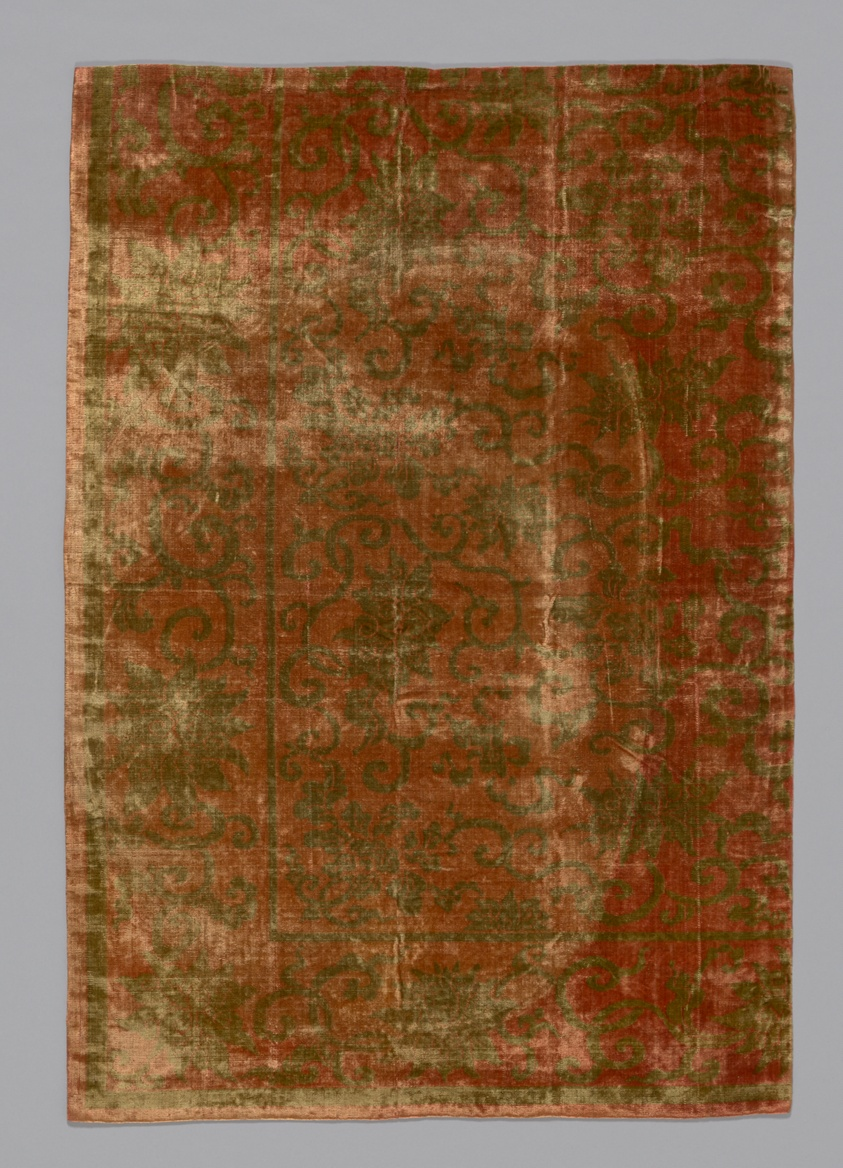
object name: Textile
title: Fragment (Furnishing Fabric)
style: qing, Chinese (culture or style), East Asian, asian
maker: China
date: Qing dynasty (1644–1911), 1775/1850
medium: Cut solid satin velvet, silk with orange warp and weft and orange-red and green pile. Design of both field and border is green peony scrolls on red ground. In the field, Buddhist emblem of sonorous stone repeated twice. Green silk lining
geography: China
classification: textile; weaving - velvet; weaving; furnishing textile